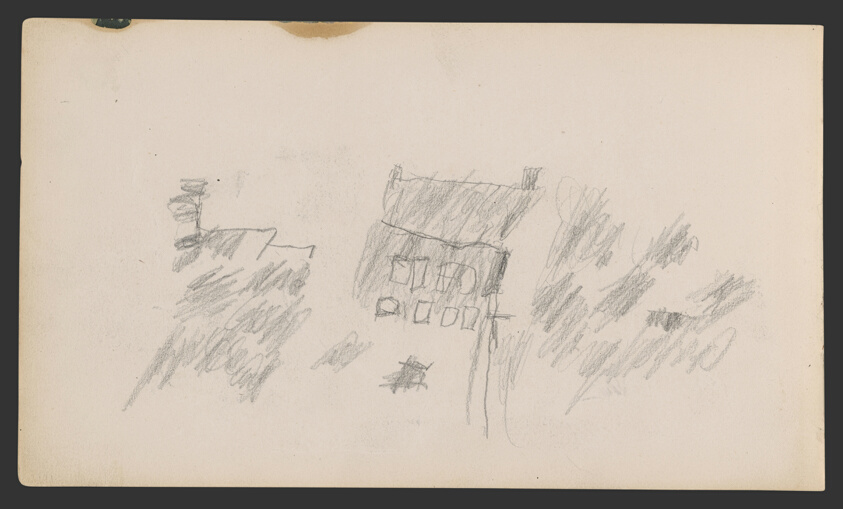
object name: Drawing and Watercolor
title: Sketchbook No. 2 (L'Estaque)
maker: Paul Cézanne; French, 1839-1906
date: 1875–86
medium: Graphite and pen and ink drawings on paper, bound into a book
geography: France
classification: sketchbook; graphite; prints and drawing; paper